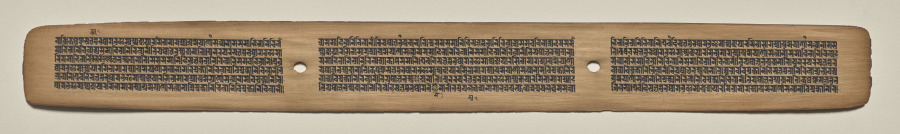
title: Text, Folio 94 (recto), from a Manuscript of the Perfection of Wisdom in Eight Thousand Lines (Ashtasahasrika Prajnaparamita-sutra)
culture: Eastern India, Bihar, Vikramashila Monastery. Painting: Nepal, Kathmandu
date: Sunday, September 14, 1119 (year 239 of the Newar Samvat in the month of Ashvina)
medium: gum tempera and ink on palm leaves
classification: Painting